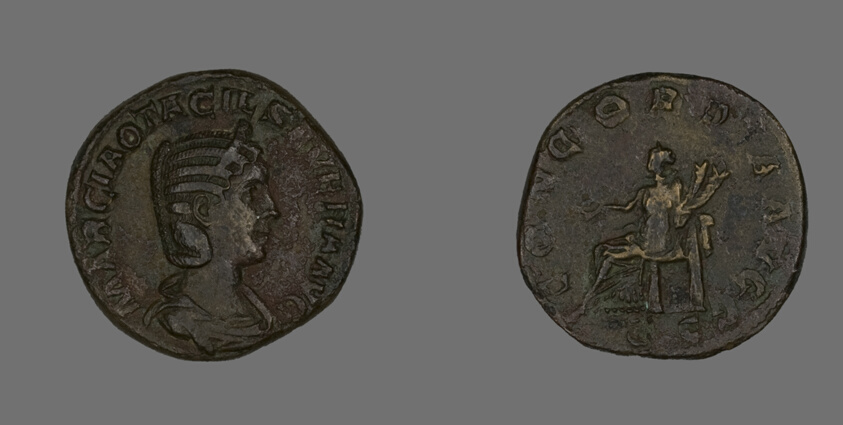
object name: Coin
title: Sestertius (Coin) Portraying Empress Marcia Otacilia Severa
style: roman (ancient, style or period), ancient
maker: Roman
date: 244-249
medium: Bronze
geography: Roman Empire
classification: coin; ancient art